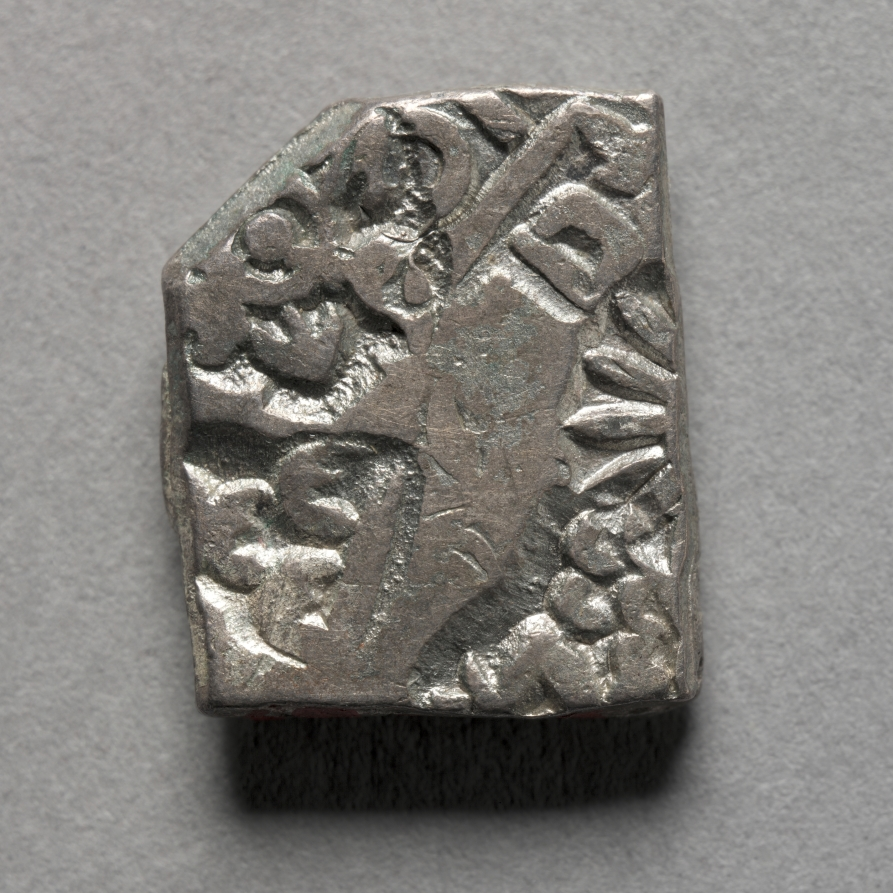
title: Punch-Marked Coin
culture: India, Rajasthan, Maurya period (322–185 BCE)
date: 400–300 BCE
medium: silver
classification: Coins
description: After Alexander of Macedon succeeded in conquering Egypt and Persia in 331 BC, his ambition to rule the known world led him further east across Bactria in Afghanistan, through the Hindu Kush mountain pass, and into India. There he succeeded in defeating all the local kings of the region until his men, on the brink of mutiny, insisted that they return to Greece. Alexander left governors in charge of his territories, and after his death in 323 BC, his governors became independent kings, establishing Hellenistic cities and a Greek cultural base in the region, which lasted for almost 200 years. Native Indian coinage was marked with symbols associated with the place where they were issued.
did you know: Early Indian coins were cut in irregular shapes and punched with a wide range of marks. The deep punches would prove that the coin was pure silver all the way through.